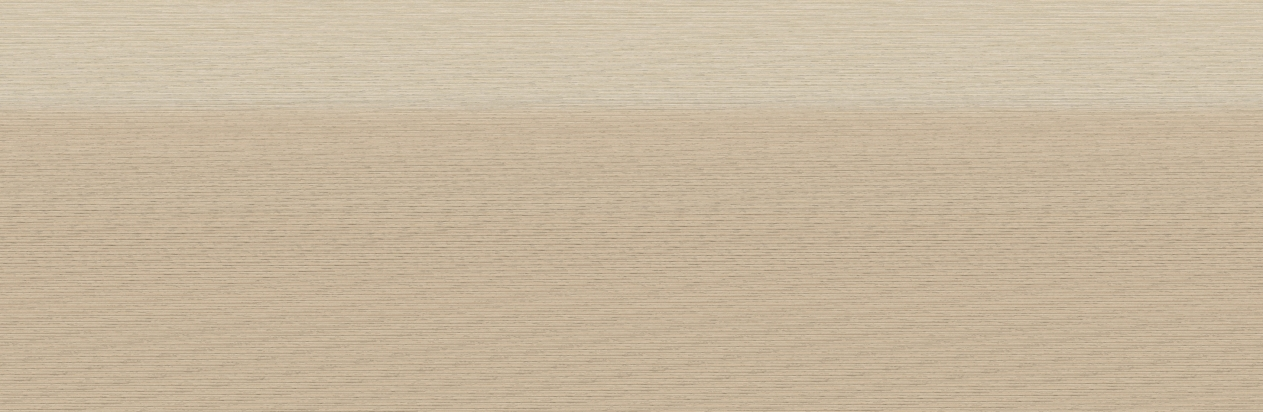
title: Beggars and Street Characters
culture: China, Ming dynasty (1368–1644)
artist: Zhou Chen (Chinese, c. 1450–c. 1536)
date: 1516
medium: Handscroll; ink and light color on paper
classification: Painting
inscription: 題: 周臣流氓圖. 古堇趙鶴琴 [印] 老鶴臨池; 鵝池軒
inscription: 正德丙子秋七月，閒窗無事 ，偶記素見市道丐者種種態度。乘筆硯之便，率爾圖寫。雖無足觀，亦可以助警勵世俗云。 東邨周臣記 [印]東邨; 舜卿; 鵝場散人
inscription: 吳中東邨周君，善丹青，尤長於人物。此圖其所見盛市丐者之狀種種，各盡其態，觀者絕倒。嗟乎，今之晝夜乞哀以求富貴者，安得起周君而貌之耶。臥雲徵君出示，余漫題其後。 甲子歲十月吳門黃姬水 [印] 士雅山人; 另一印不詳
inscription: 是冊凡數種。其飢寒流離疲癃殘疾之狀，種種之異。觀此而不惻然心傷者，非仁人也。計正德丙子逆瑾之流毒已數年。而[江]彬 [錢] 寧輩肆虐方熾。意分符剖竹諸君，亦鮮有能撫字其民者。然則舜卿此作，殆與鄭君 流民圖同意。其有補於治道者不淺，要不可以墨戲忽之也。 長洲張風翼題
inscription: 東村此筆，蓋圖寫飢寒乞丐之態，以警世俗耳。而質山 [黃姬水]欲其寫昏夜乞哀，而靈墟[張鳳翼]則擬之於安上門圖。二君之見，其各有所指哉。昔唐六如每見周筆，輒稱曰：周先生！蓋深服其神妙之不可及。若此冊者，信非他人可能而有符於六如之心伏矣。豈易得耶。若黃、張之指，則又論於畫之外，不在於形似筆墨之旨也。 萬歷丁丑十二月三日 茂苑文嘉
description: Zhou Chen from Suzhou provides rare depictions of impoverished people that once filled the city’s markets and streets. Despite Suzhou’s prosperity, its rapid growth polarized society, including the wealthy and those who had deserted their farmlands, who were without homes, unemployed, or sick. Amid these are figures who inspire fear rather than empathy. The painting may thus be informed by local practices at the end of the lunar year, in which street beggars, in exchange for food or money, would dress up like ghosts and demons to drive out evil forces.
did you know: Although Zhou Chen's original composition was an album of 24 figures, today it is mounted as two handscrolls, one in the Cleveland collection and one in the Honolulu Museum of Art.